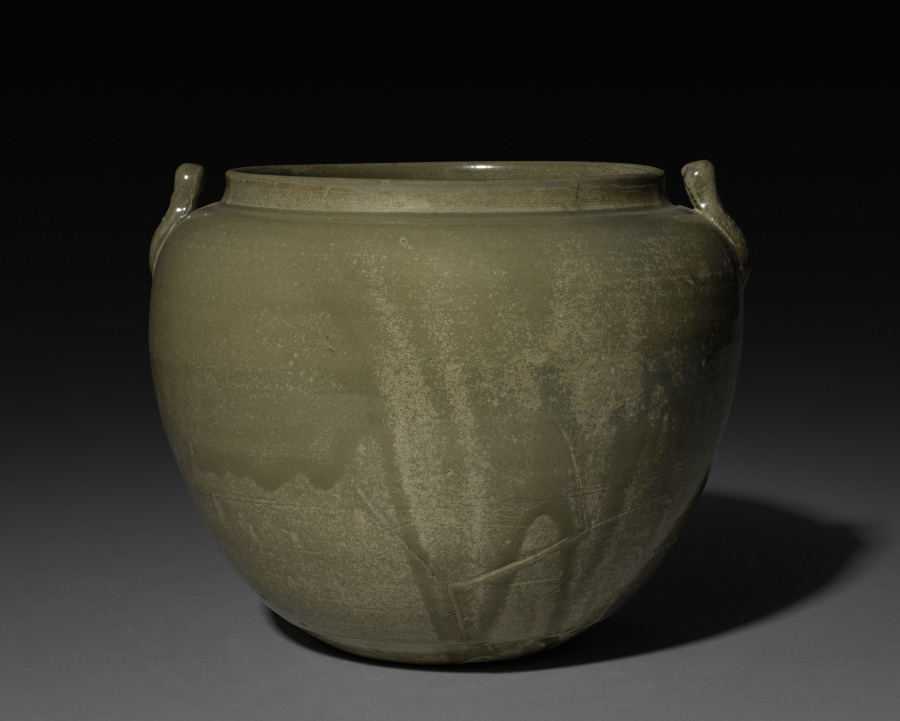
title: Jar with Handles: Yue ware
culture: China, Tang dynasty (618-907)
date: c. 800s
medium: gray stoneware with iron glaze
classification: Ceramic